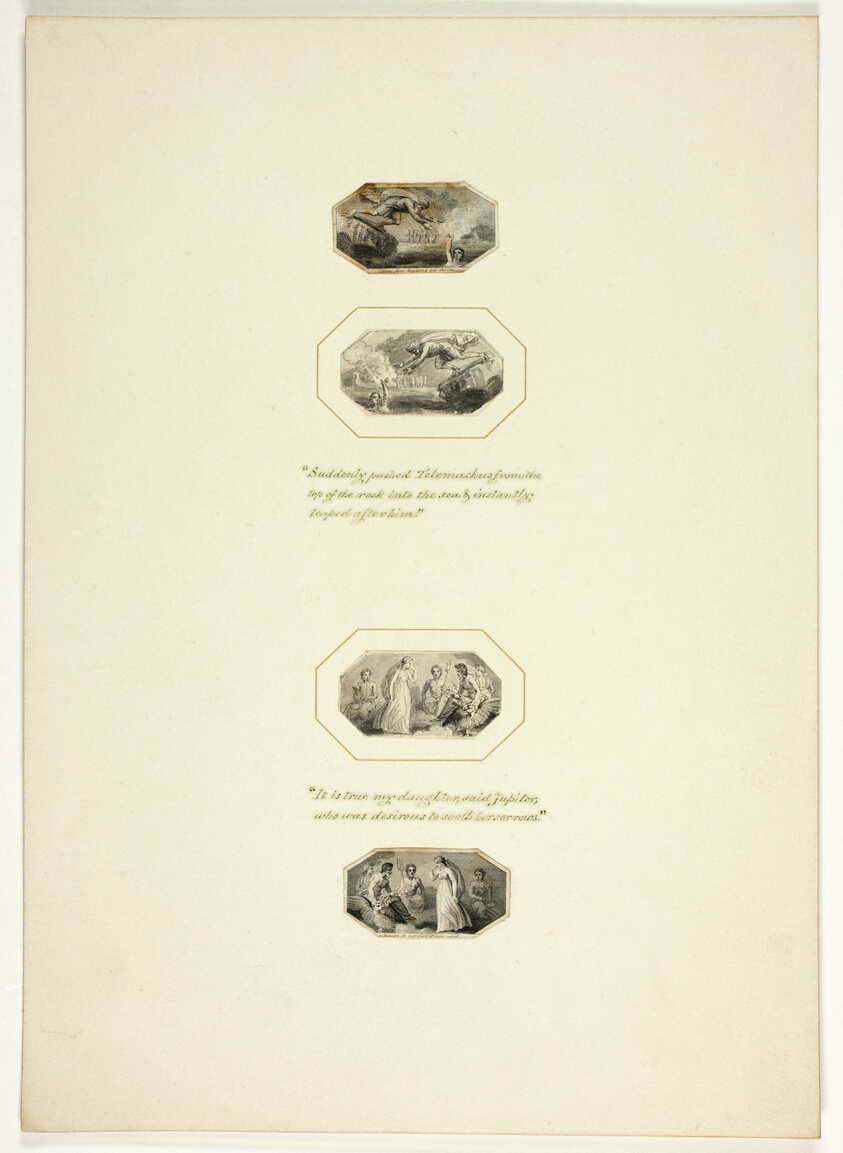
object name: Print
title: Plate from Telemachus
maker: after Thomas Stothard (English, 1755-1834); published by T. Baker (English, 19th century)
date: c. 1797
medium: Engraving on paper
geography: England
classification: engraving; drawings (visual works); prints and drawing; print